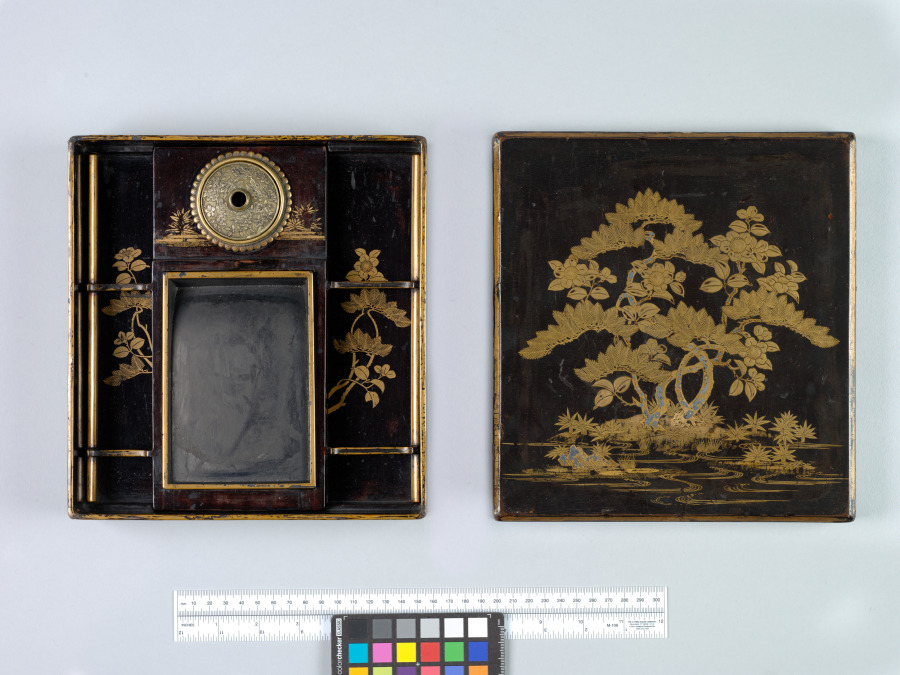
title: Writing Box (Suzuribako) with Pine, Camellia, and Bamboo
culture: Japan, Muromachi period (1392–1573)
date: 1400s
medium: Lacquered wood with gold and silver sprinkled powder (maki-e), stone, and metal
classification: Lacquer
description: Japanese writing boxes are designed to hold all the tools for traditional calligraphy, including an inkstone, water dropper, ink cake, and brushes. This box retains its inkstone and water dropper, the latter of which has a design of camellia and pine, matching the late winter, early spring lacquer motifs on the lid.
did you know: Pine, bamboo, and plum is a common seasonal motif; here the plum is replaced with camellia.